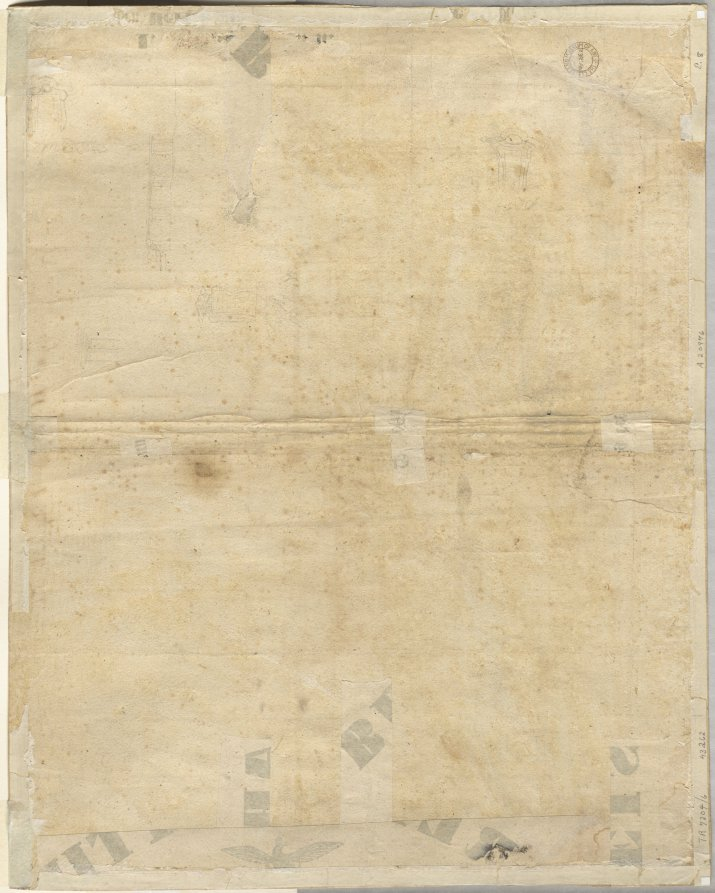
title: Sketches of Windows and Pilasters of the Attic Storey of the Collegio di Propaganda Fide (verso)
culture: Flanders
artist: Lievin Cruyl (Flemish, c. 1640-c. 1720)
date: 1665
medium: graphite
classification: Drawing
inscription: upper left, in brown ink: S45[masked] ; upper right, in graphite(?): me[illegible, sideways] ; center, in graphite(?): [illegible] / me[illegible] ; ON PAPER STRIP MOUNTED TO PERIMETER, lower center, in graphite: A20976 ; lower right, in graphite: E. 8